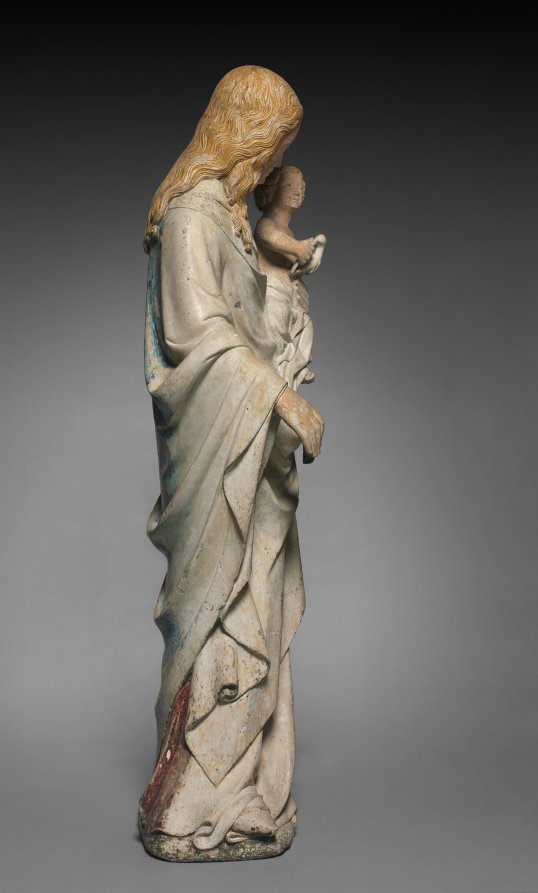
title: Virgin and Child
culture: France, Loire Valley, 14th century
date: c. 1385–90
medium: limestone with traces of polychromy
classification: Sculpture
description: The vibrant naturalism of the Virgin’s face and long flowing hair, as well as the deep, rich folds of drapery are characteristic of the work of itinerant artists from the Netherlands who found employment at the Valois courts of France at Paris, Berry, and Burgundy. Their native styles and attention to realistic detail fused with native French artistic traditions toward the end of the 14th century and took root. The original source of this Virgin and Child is unknown, but its style suggests a relationship with similar sculptures made for churches and abbeys of the Central Loire Valley. The additional influence of the style of the sculptor André Beauneveu has also been noted for this sculpture. His commissions were abundant and his influence widespread. The sculptor of this work appears to have had some knowledge of Beauneveu’s work in the Loire region.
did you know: This sculpture was painted over many times over its history, common for medieval sculpture.